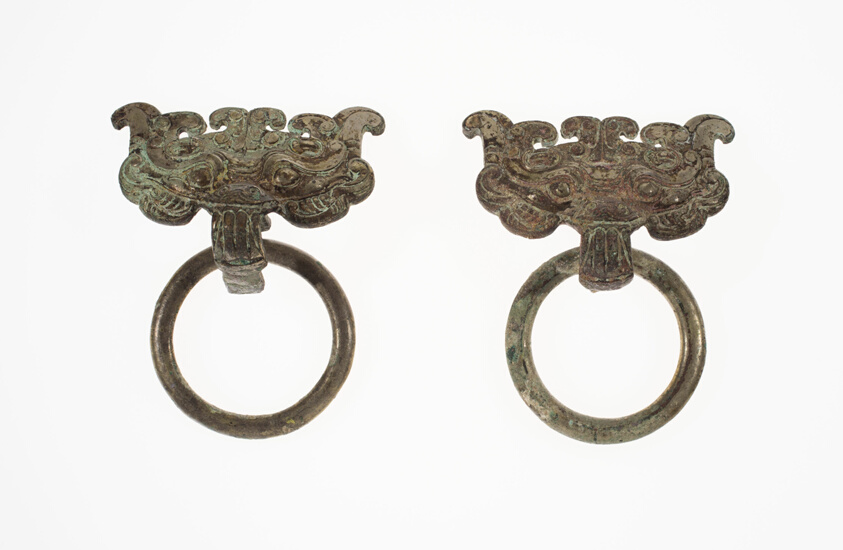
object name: Decorative Arts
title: Monster-Mask Fittings with Ring Handle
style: Chinese (culture or style)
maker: China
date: Han dynasty (206 B.C.–A.D. 220)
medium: Gilt bronze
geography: China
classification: bronze; asian art; fitting; metal; decorative arts